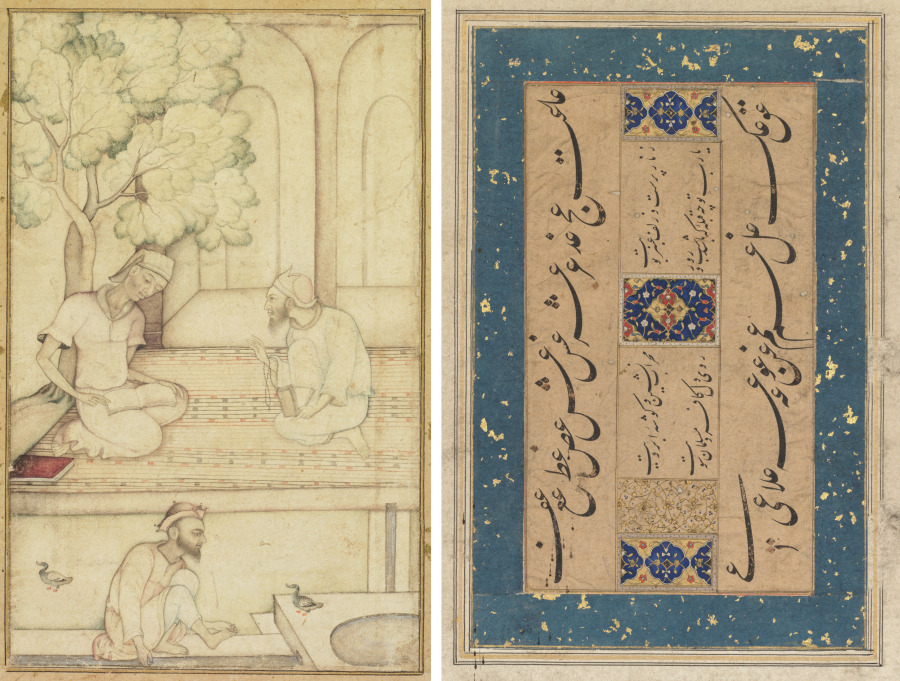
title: Kabir and Two Followers on a Terrace (recto); Calligraphy (verso)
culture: India, Mughal, 17th century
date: c. 1610–1620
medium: Gum tempera, ink, and gold on paper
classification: Painting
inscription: Verso: Persian ruba‘i (quatrain) by Maulana Muḥammad Murshidi Zawara’i (Persian, late 1500s–early 1600s); Calligraphy in nasta‘liq script: A Christian with his zonnar string and your amber locks, A pious ascetic in a prayer niche and the angle of your eyebrows, O Lord! What kind of a qibla are you That night and day the hearts of both Muslims and Infidels are turned toward you?